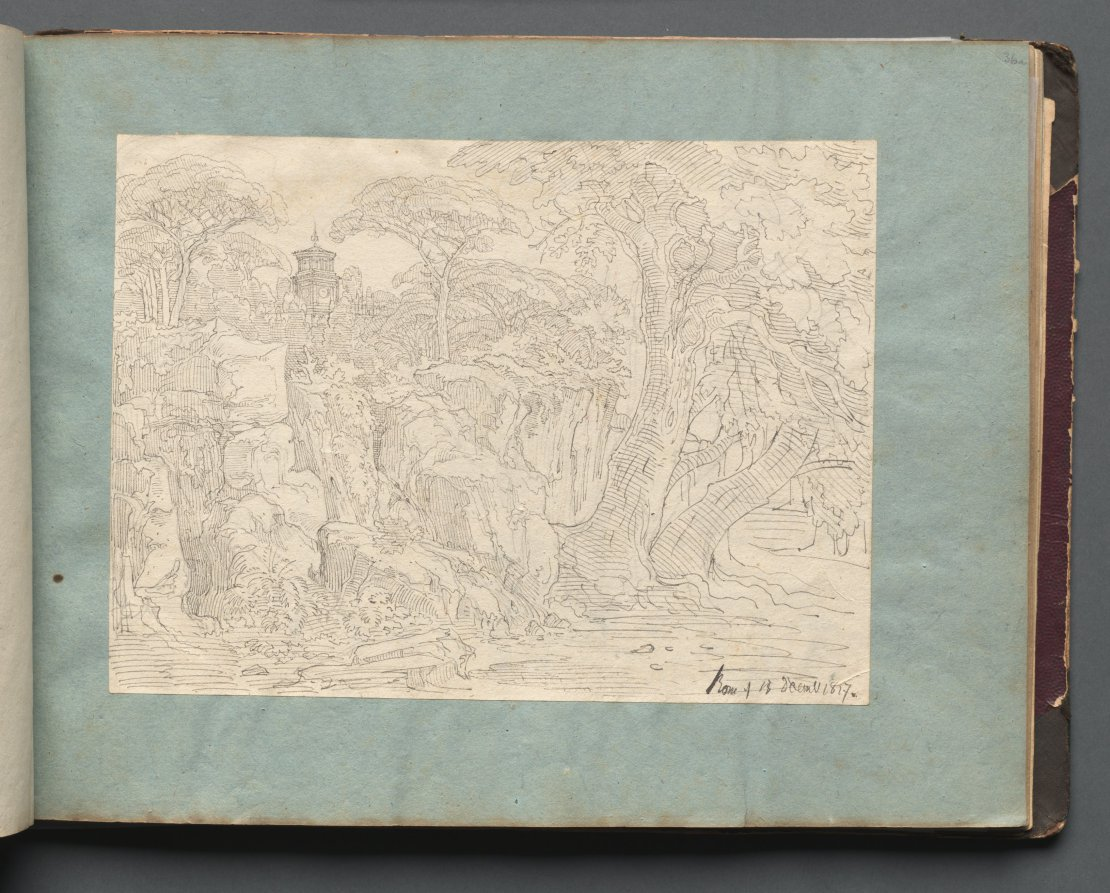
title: Album with Views of Rome and Surroundings, Landscape Studies, page 36a: Roman View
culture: Germany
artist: Franz Johann Heinrich Nadorp (German, 1794–1876)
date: c. 1830s-70s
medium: pen and ink with graphite on white paper laid down on blue paper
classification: Bound Volume